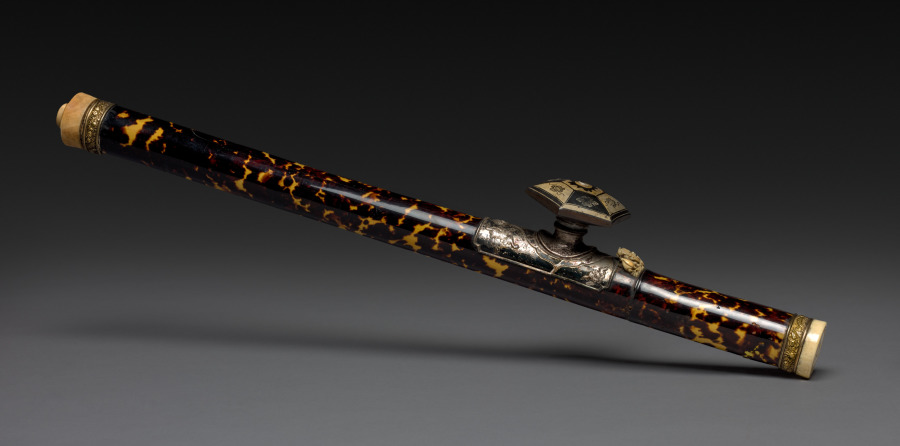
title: Opium Pipe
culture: China, Qing dynasty (1644-1911)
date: 1800s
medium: imitation tortoise-shell with gilt silver and silver decoration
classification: Miscellaneous